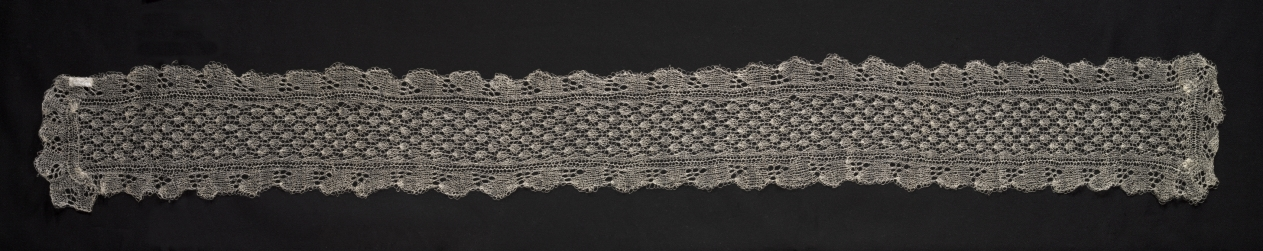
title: Abacá lace sampler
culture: Philippines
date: c. 1910–23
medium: abaca fiber(?): knitting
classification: Knitting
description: This strip of lace is unusual for being worked entirely in abacá fiber, a material more commonly associated with cordage, woven textiles, and ceremonial cloth. Abacá’s natural stiffness and high tensile strength make it a challenging medium for techniques that require tight looping or knotting, such as lace making. This object reflects a hybrid craft tradition in which imported techniques were executed using local fibers.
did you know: This object was likely produced where abacá was abundant and lace making was introduced through convents or mission schools—perhaps the Eastern Visayas or Bicol regions of the Philippines.